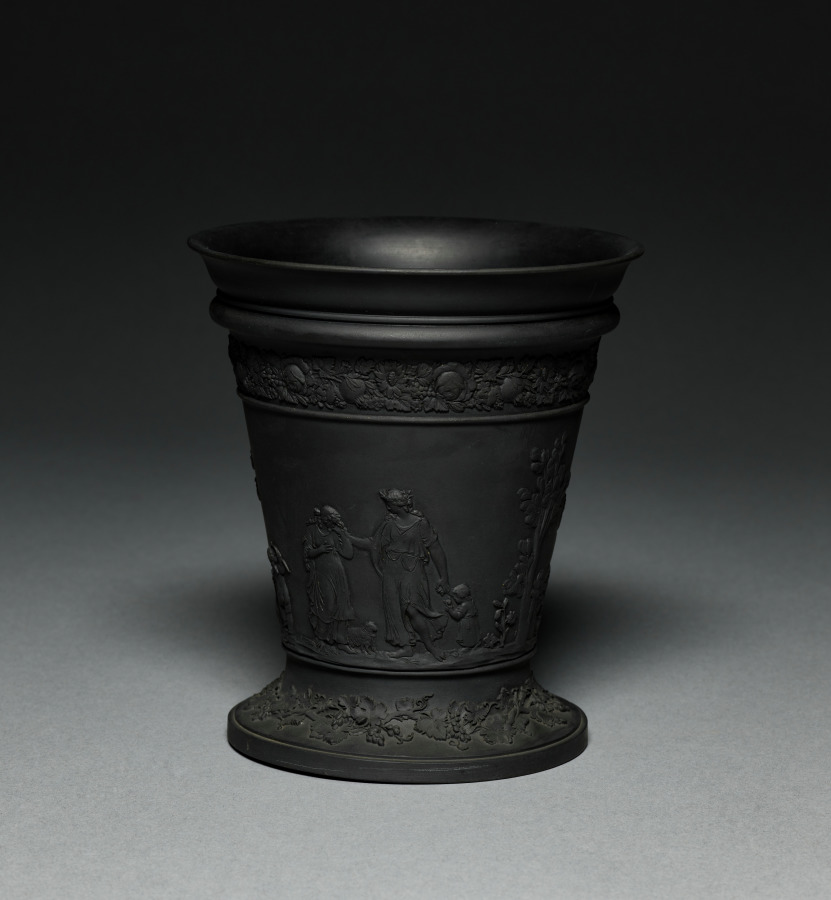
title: Jardiniere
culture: England, Staffordshire, 18th century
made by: Wedgwood Factory (British)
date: late 1700s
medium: black basalt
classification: Ceramic